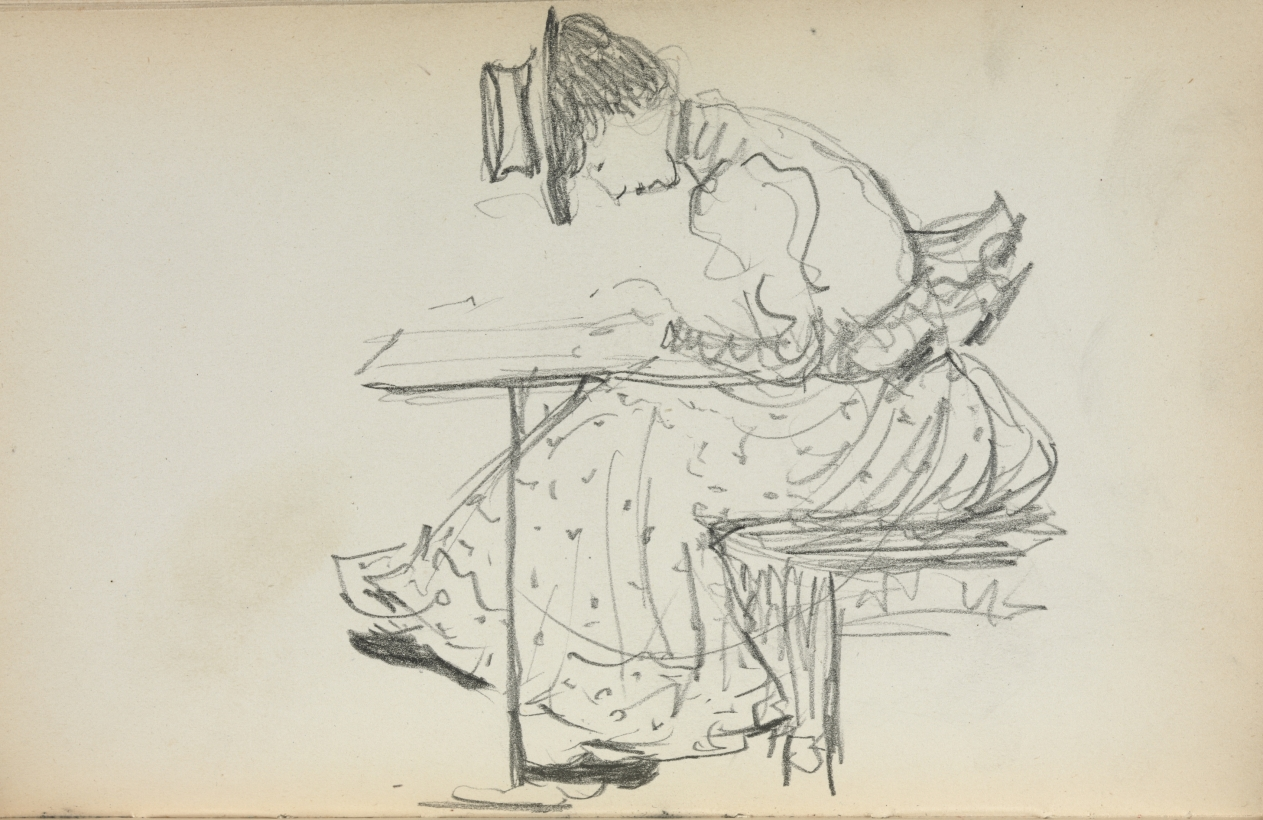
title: Italian Sketchbook: Seated Woman (page 107)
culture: America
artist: Maurice Prendergast (American, born Newfoundland [now Canada], 1858–1924)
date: 1898–1899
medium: pencil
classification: Bound Volume